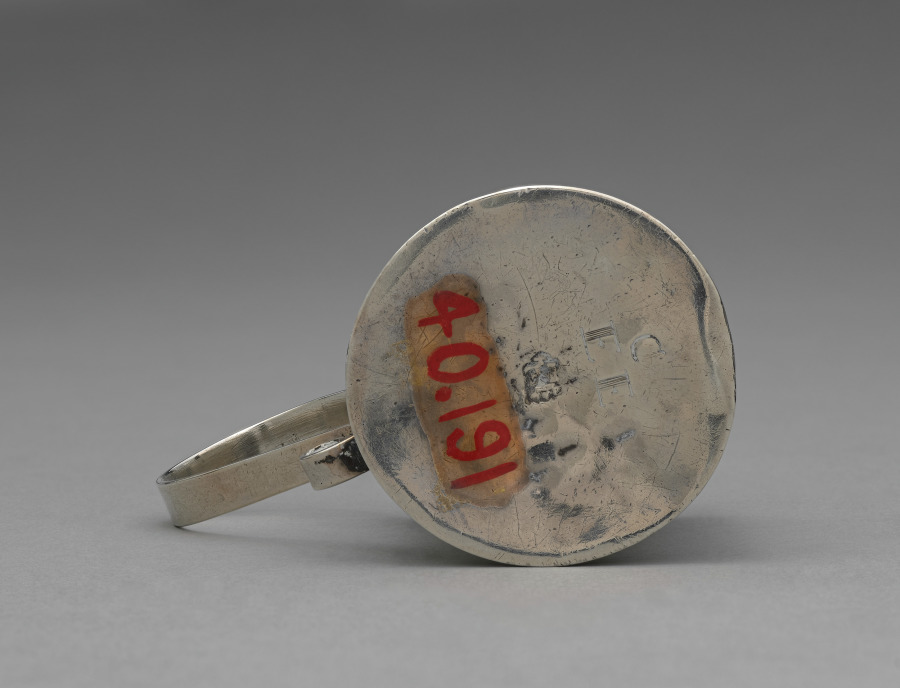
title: Caster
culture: America, Massachusetts, Boston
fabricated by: John Edwards (British)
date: c. 1715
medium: silver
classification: Silver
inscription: engraved "C" over "EE" in shaded block letters on bottom, and "FLB" (later) in bright-cut script on front, opposite handle.